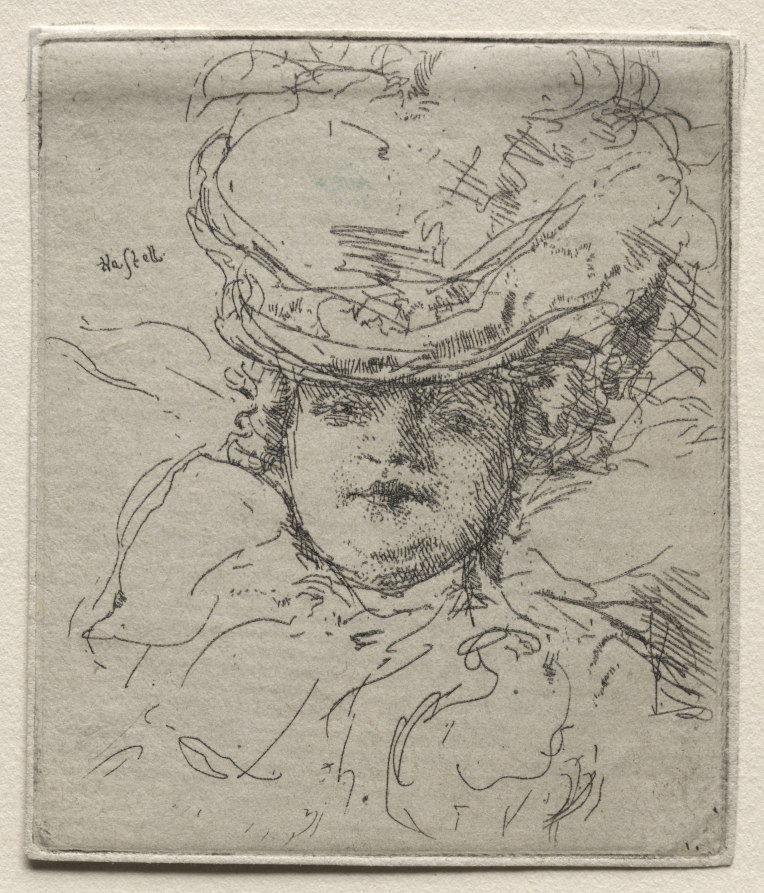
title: Paris: Boul Miche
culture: America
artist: Ernest Haskell (American, 1876–1925)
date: 1910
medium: etching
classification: Print